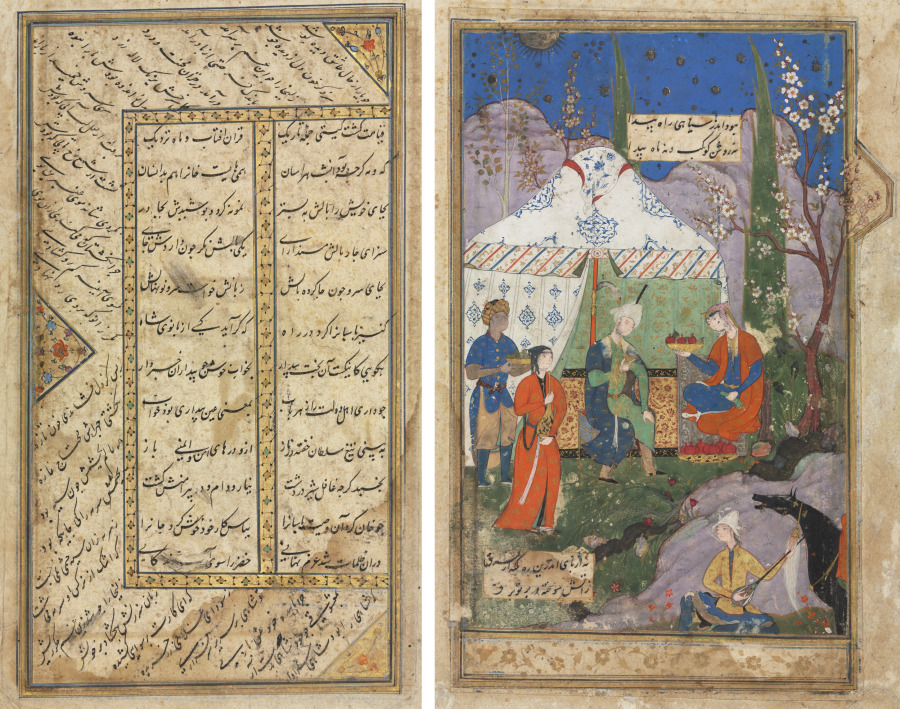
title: An Episode from the Story of the Sasanian King Khusrau and His Beloved Shirin, from a Khamsa (Quintet) of Nizami (1141–1209) (verso); Persian verses from a Haft Awrang (Seven Thrones) of Jami (d. 1492) (recto)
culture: Iran, probably Shiraz, Safavid period (1501-1722)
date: 1540–70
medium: opaque watercolor, gold, silver, and ink on paper; double-sided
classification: Manuscript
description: The Khamsa is a collection of five narrative poems, one of which is dedicated to the romance of Khusrau Parviz (590–628), a Sasanian king of Iran, and Shirin, his beloved Armenian princess. The lovers are seated in a nocturnal landscape, indicated by the dark blue sky dotted with stars, painted with now tarnished silver. Shirin serves figs and pomegranates, symbolic of fertility, to Khusrau as attendants bring more figs and wine. Next to Shirin’s black horse, the musician at bottom right plays a tanbur, a long-necked, fretted lute.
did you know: Khusrau’s turban has the anachronistic baton worn by Safavid royalty and the egret feather, an emblem of nobility instituted by the Mongols in the 1200s.